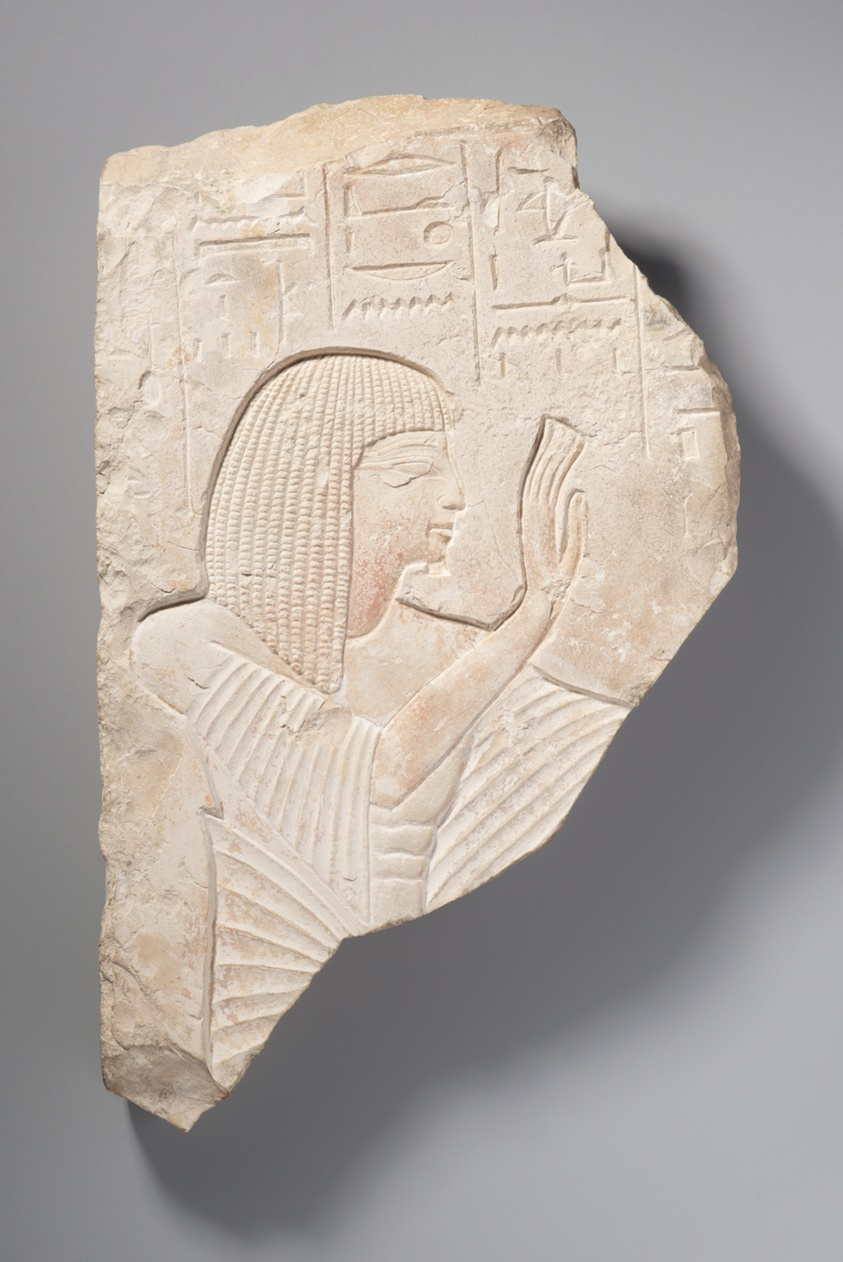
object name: Architectural fragment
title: Fragment of a Stela of Neferhotep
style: new kingdom, nineteenth dynasty, ancient, egyptian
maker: Egyptian; probably Theban Tomb 216, Deir el-Medina, Egypt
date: New Kingdom, mid-Dynasty 19, about 1240-1195 BCE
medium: Limestone and pigment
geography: Egypt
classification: Stelae; architectural fragment; stone; sculpture; ancient art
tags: portraits, praying, Hieroglyphs, men